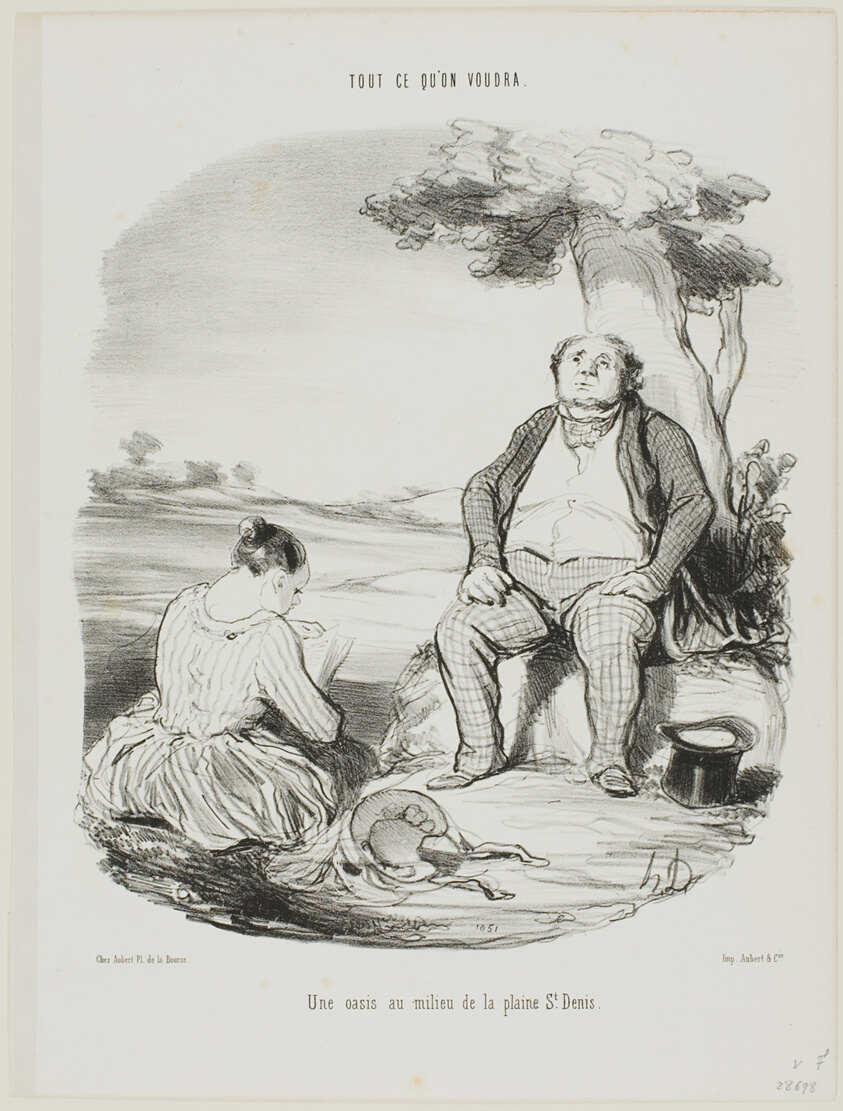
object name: Print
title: An Oasis in the Middle of the Plain of St. Denis, plate 5 from Tout Ce Qu'on Voudra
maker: Honoré Victorin Daumier; French, 1808-1879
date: 1847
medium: Lithograph in black on white wove paper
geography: France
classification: lithograph; print; prints and drawing